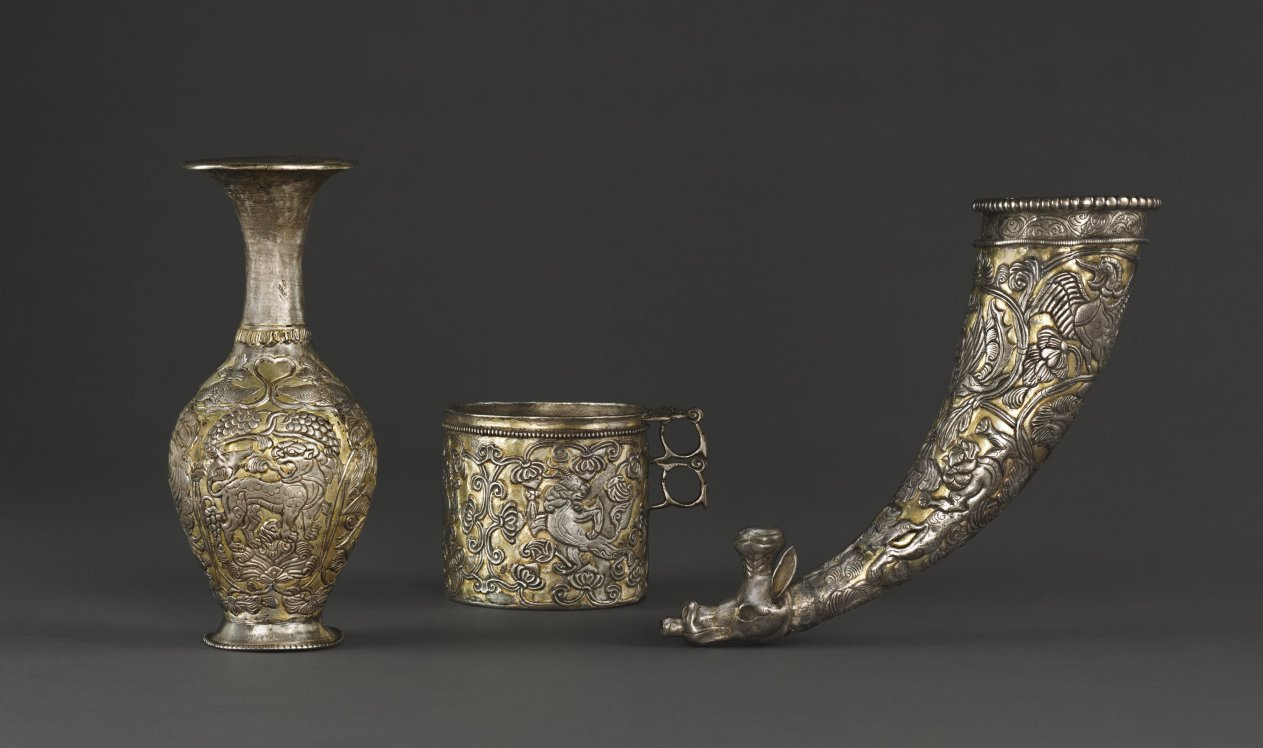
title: Beaker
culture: Central Asia (Sogdiana) or Tibet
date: c. late 600s–early 700s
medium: silver with gilding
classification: Silver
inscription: Inscribed on bottom of the cup: "Phan shing gong skyes gui sug byad (or byang)"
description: The circular shapes of the cup’s handle feature a flat edge on which the user rested their thumb for better grip, a design characteristic of silver objects made during the 700s by Sogdian artists, who traveled from Central Asia along international trade routes. An ownership inscription in Tibetan script on the underside of the cup identifies the vessel as a personal possession. The circles and lines carved below this inscription are likely measurements recording the weight of the silver used for the cup.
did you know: This cup depicts two lions and a lionlike animal with horns!